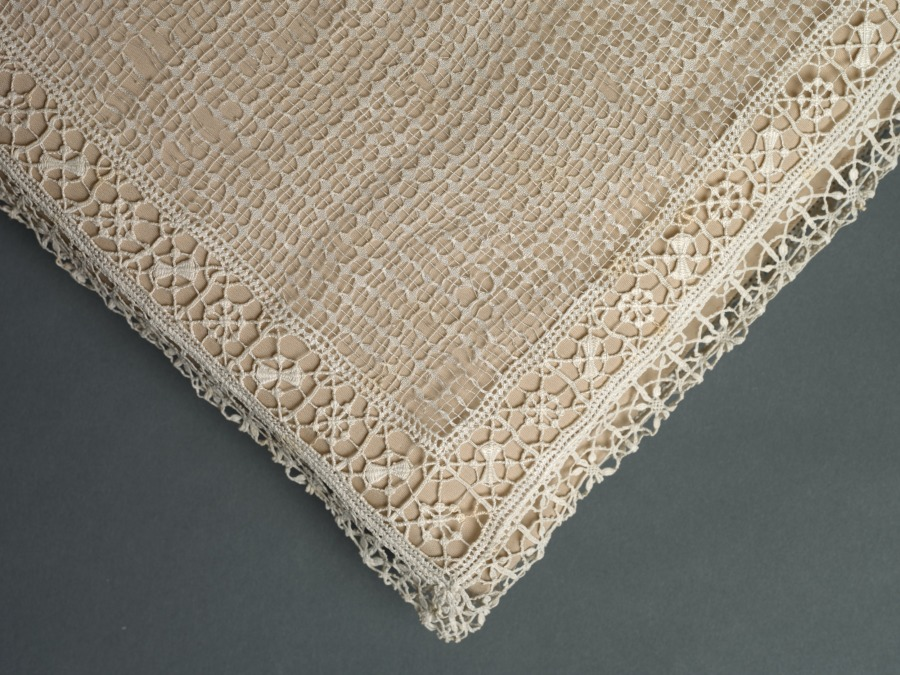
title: Lace Pillow Cover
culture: Italy, Genoa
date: 1600s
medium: Linen: needle lace (drawnwork or Punto Tirato and reticella) and bobbin lace edging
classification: Lace